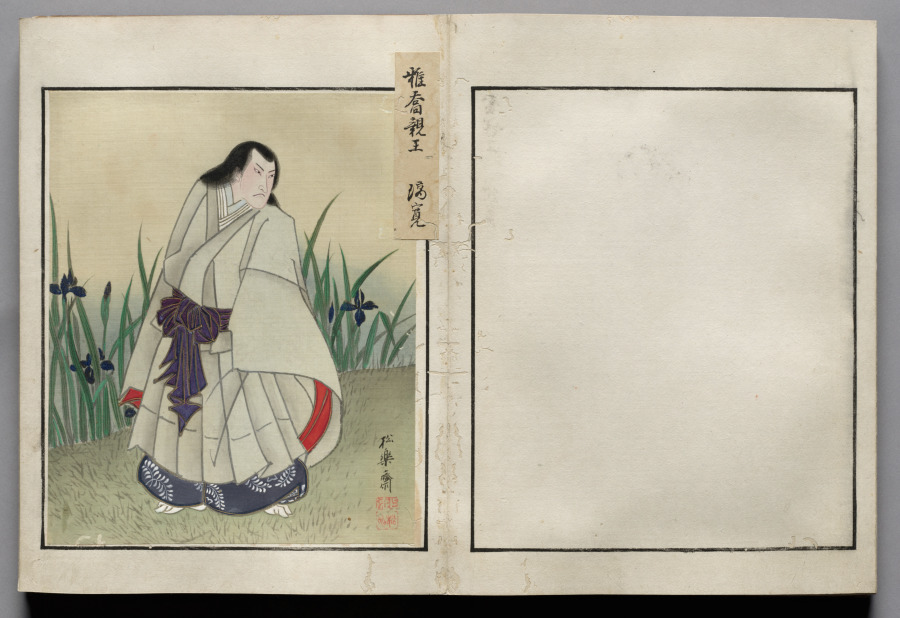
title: Double-Leaf from Album of Actor Portraits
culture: Japan, Edo period (1615–1868)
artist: Shōrakusai (Japanese)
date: c. 1790–1810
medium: double-leaf from an accordion-style album; ink and color on silk (left)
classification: Bound Volume